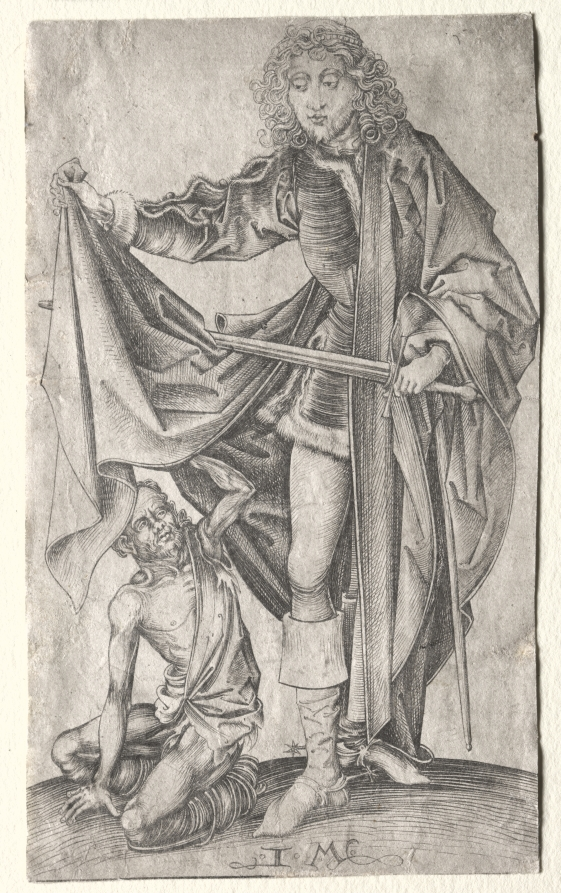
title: St. Martin Dividing His Cloak for a Beggar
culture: Germany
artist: Israhel van Meckenem (German, c. 1440–1503)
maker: after Martin Schongauer (German, c. 1450–1491)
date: c. 1485–90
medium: engraving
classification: Print